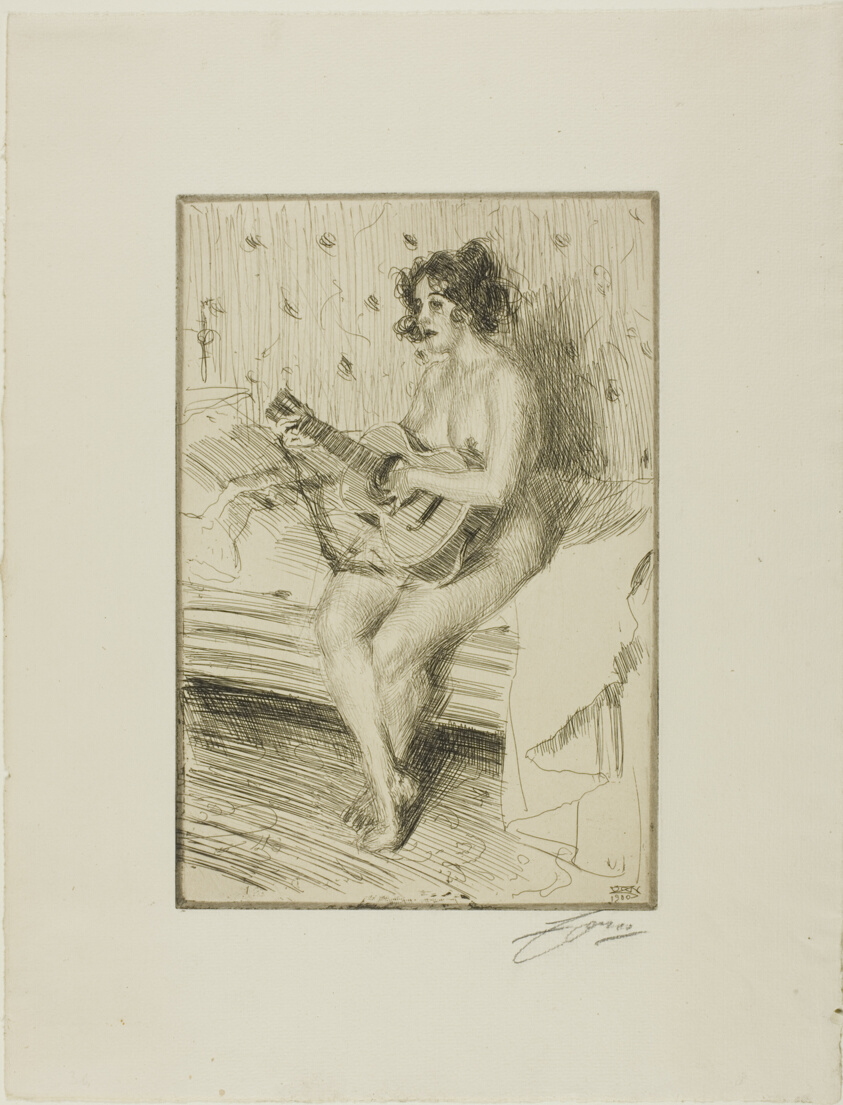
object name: Print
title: The Guitar-Player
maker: Anders Zorn (Swedish, 1860-1920)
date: 1900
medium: Etching on ivory laid paper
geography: Sweden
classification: etching; print; prints and drawing